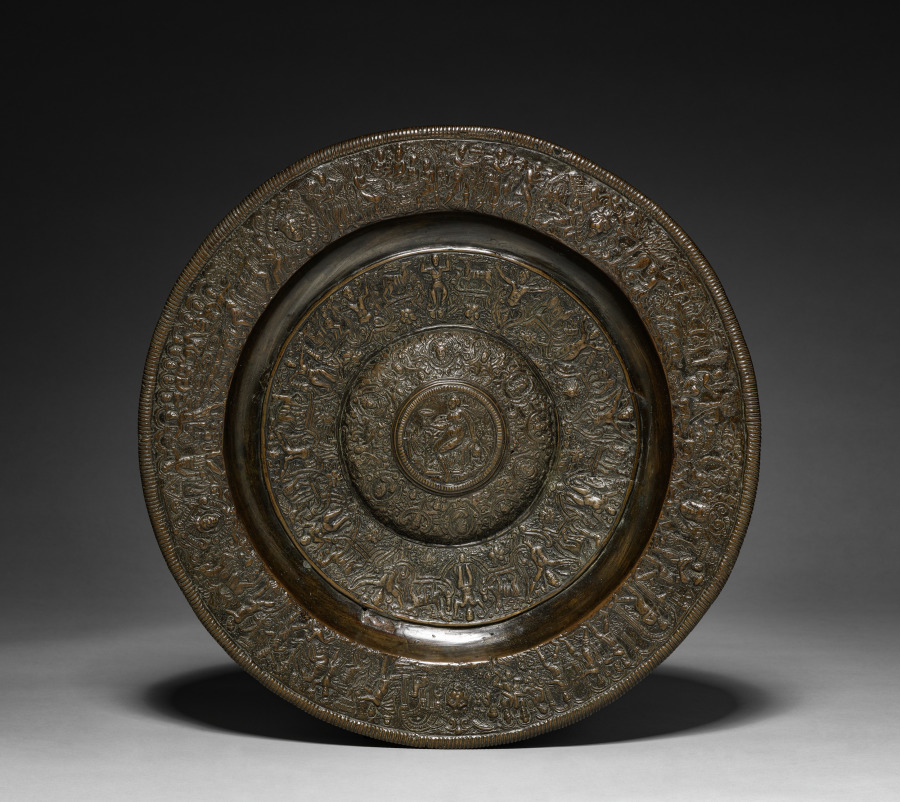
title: Platter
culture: Germany, early 17th century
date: early 1600s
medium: bronze, golden brown patina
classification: Metalwork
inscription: on front: "TEMPERANTIA."